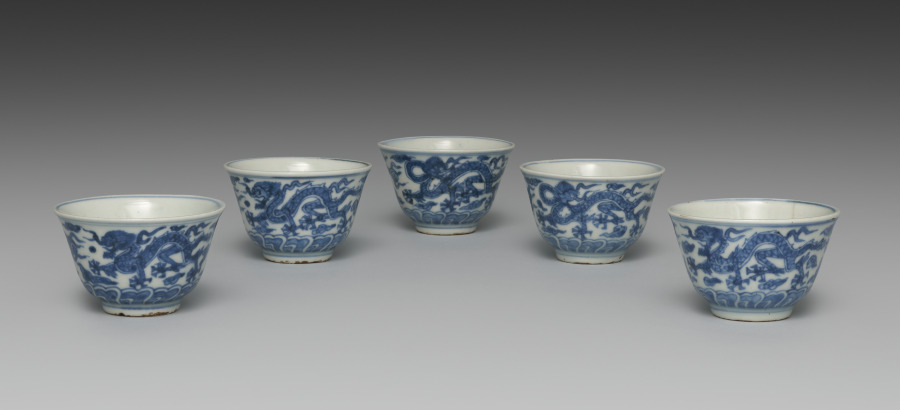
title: Teacups with Dragons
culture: Japan, Edo period (1615–1868)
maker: Seifū Yohei I (Japanese, 1801–1861)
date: 1840s–57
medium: Set of five tea cups; porcelain with underglaze blue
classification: Ceramic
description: Seifū Yohei I made both blue and white porcelains after Ming dynasty (1368–1644) Chinese wares fired in the kilns at Jingdezhen for export. He also made colorful stoneware in the style of his teacher, Nin’ami Dōhachi (Takahashi Dōhachi II) (1783–1855).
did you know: A small figure of an elephant serves as the handle for the lid.